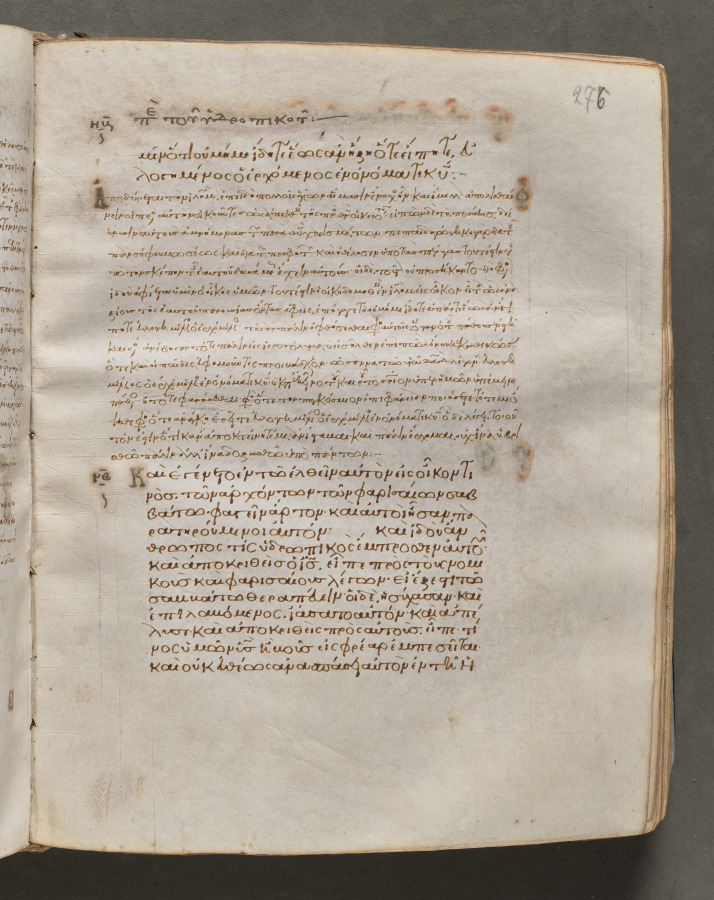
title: Text, folio 276 (recto), from a Gospel Book with Commentaries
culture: Byzantium, Constantinople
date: c. 1000–1100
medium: ink, tempera, and gold on vellum; leather binding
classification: Bound Volume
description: Each of the four gospels in this book opens on a page with brilliantly illuminated borders depicting the author of the text as well as birds—principally peacocks, symbols of the immortality of the soul—and fountains, representing the fountain of life and the salvation of the soul. This volume consists of 428 leaves with texts in Greek. Its level of sophistication suggests that it was probably written and decorated in a monastery in Constantinople.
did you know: Gospel books were carried in procession through Byzantine churches.